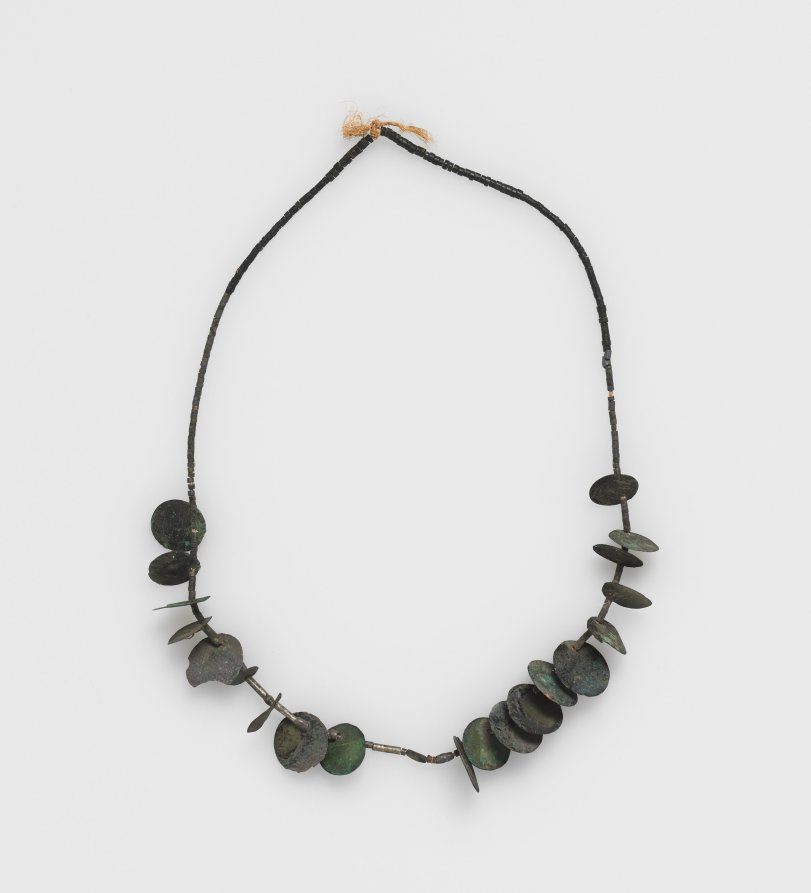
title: Necklace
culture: Peru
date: before 1532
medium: silver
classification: Jewelry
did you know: These ancient beads were restrung in modern times.